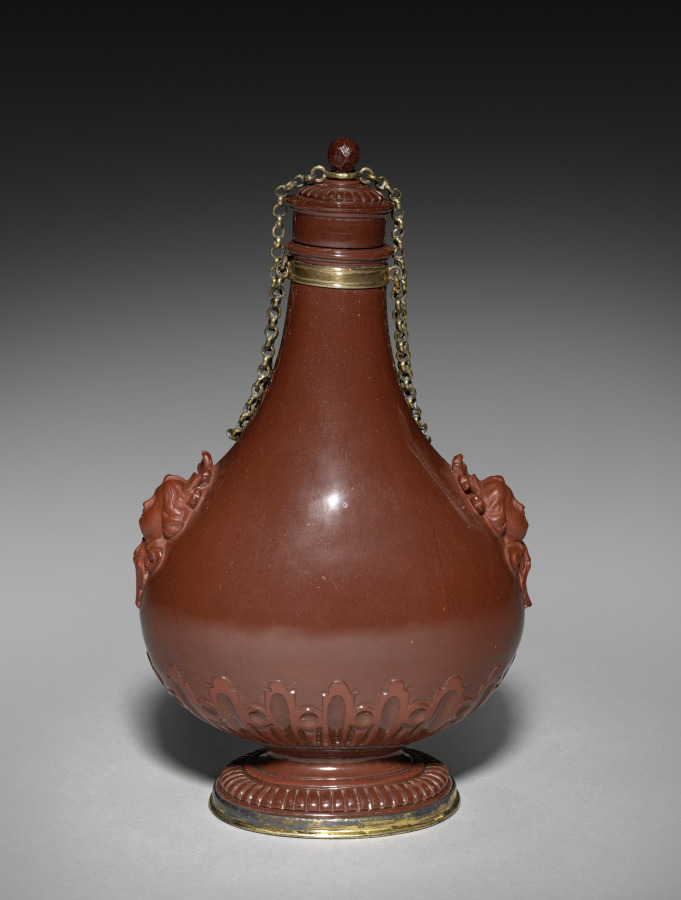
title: Pilgrim Bottle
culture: Germany, Meissen, 18th century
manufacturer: Meissen Porcelain Factory (German, est. c. 1710)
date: c. 1715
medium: polished red stoneware, silver-gilt mounts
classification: Ceramic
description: Throughout the early 1700s porcelain was imported to Europe from China and Japan, until the correct formula to produce it was developed by Johann Friedrich Böttger and a collaborator, which led to the establishment of the Meissen factory in 1710. Red stoneware inspired by Chinese Yixing ware and white porcelain were produced in Meissen under Böttger. Its fine red stoneware was so hard that it could be polished on a lapidary’s wheel—as was the body of this bottle.